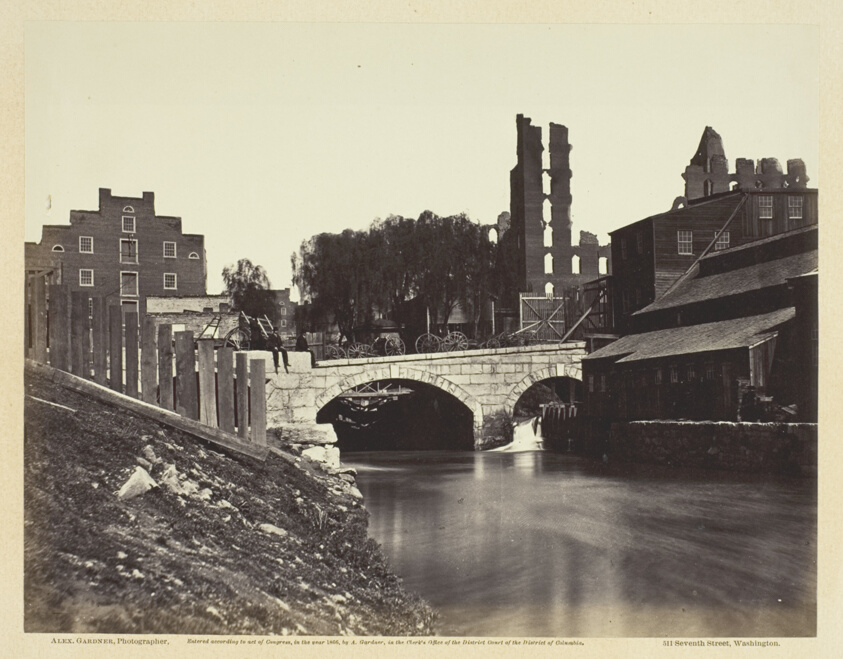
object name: Photograph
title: View on Canal, Near Crenshaw's Mill, Richmond, Virginia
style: 19th century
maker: Alexander Gardner (American, born Scotland, 1821–1882)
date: April 1864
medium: Albumen print, pl. 92 from the album "Gardner's Photographic Sketch Book of the War, Volume II" (1866)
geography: United States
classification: photograph; albumen silver print; photography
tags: Collected by Hugh Edwards, Gardner's Photographic Sketch Book